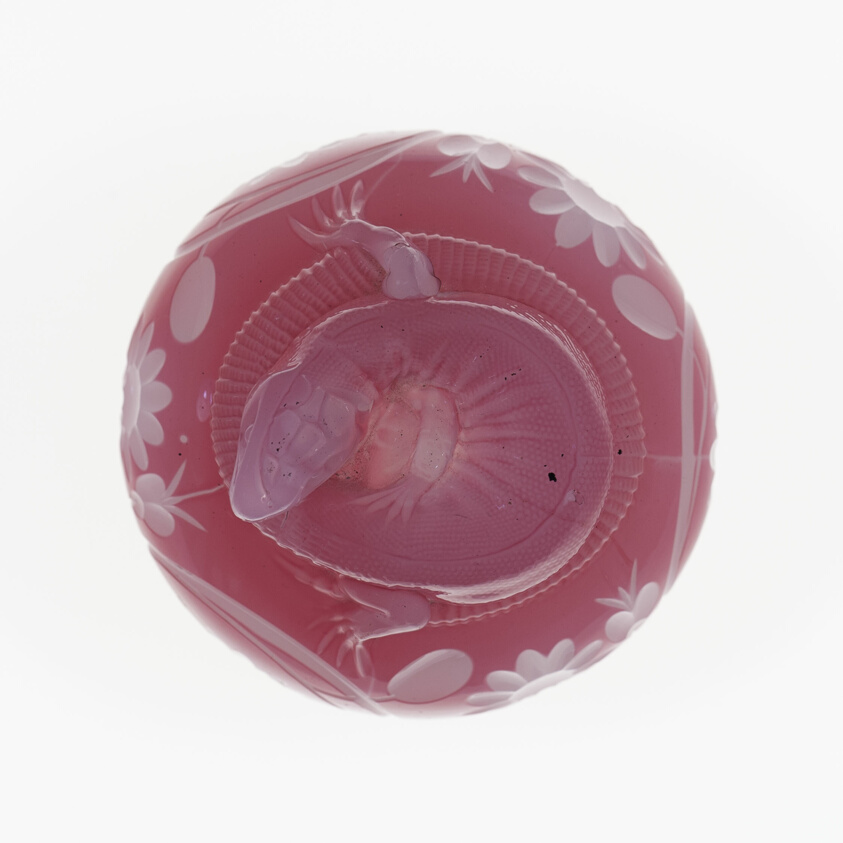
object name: Glass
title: Paperweight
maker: Saint-Louis Glassworks (Cristalleries de Saint-Louis); Lorraine, France, founded 1586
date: c. 1845–60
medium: Glass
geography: Saint-Louis-lès-Bitche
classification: paperweight; glass